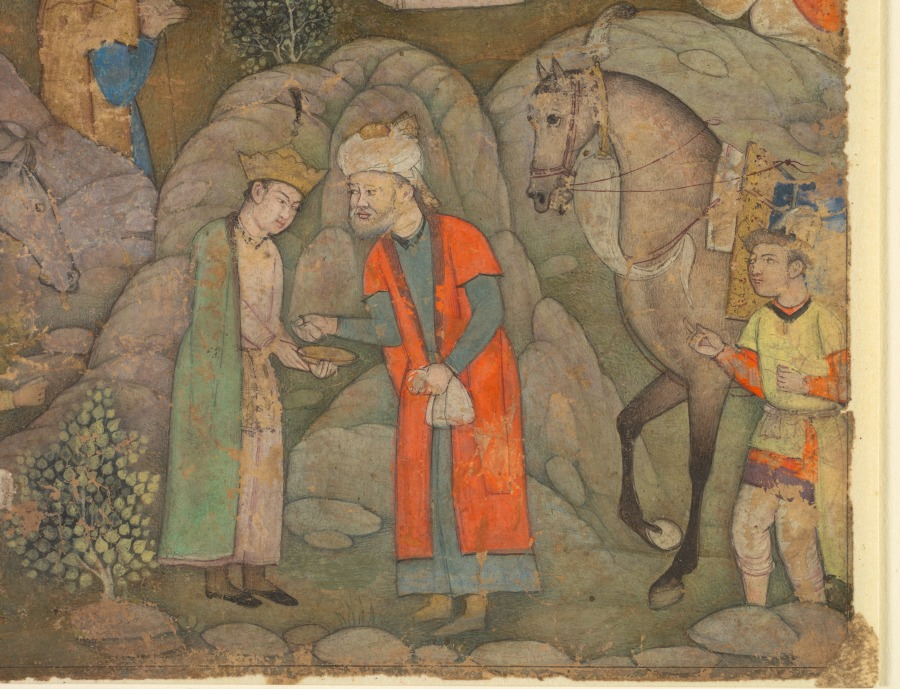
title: An Ambassador before Humayun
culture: Mughal India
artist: attributed to Miskin (Indian, active 1570s–c. 1604)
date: c. 1610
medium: Gum tempera and gold on paper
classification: Painting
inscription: Persian inscription at upper left probably added c. 1700s, in nasta‘liq script: the work of the master Miskin / Great King Hasan . . .]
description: Humayun, the second Mughal emperor of India, son of Babur and father of Akbar, is enthroned in an outdoor royal encampment. The scene recalls Humayun’s 15 years of exile between 1540 and 1555, many of which he spent traveling through Pakistan, Afghanistan, and Iran, after an Afghan rebel ousted him from India.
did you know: Humayun wore a special type of turban, his Taj-i Izzat (Crown of Power and Glory).